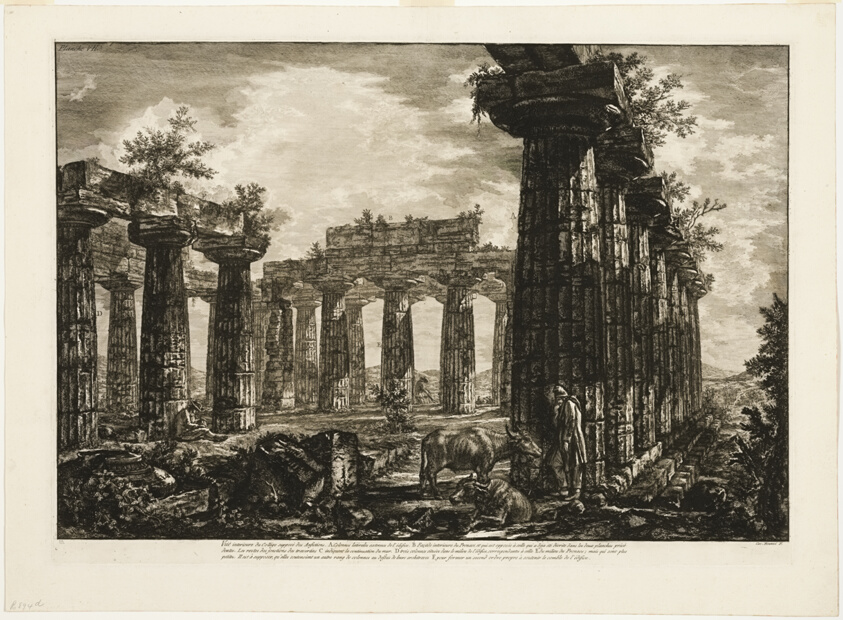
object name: Print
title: Interior view of the so-called College des Anfictions, from Different views of Paestum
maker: Giovanni Battista Piranesi (Italian, 1720-1778)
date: 1778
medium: Etching on ivory laid paper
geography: Italy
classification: etching; print; prints and drawing